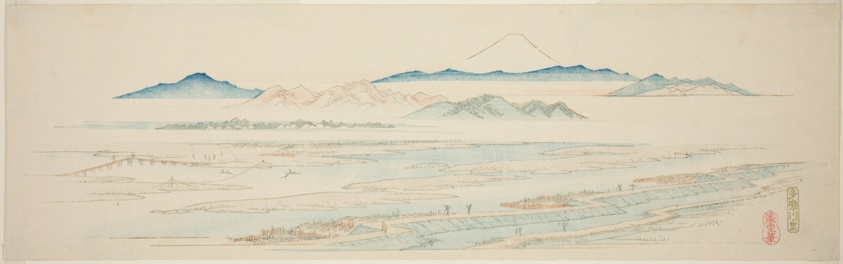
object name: Print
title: Village of Tamagawa (Tamagawa no sato), from an untitled series of famous views of the Edo suburbs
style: Japanese (culture or style)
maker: Utagawa Hiroshige 歌川 広重; Japanese, 1797-1858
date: c. 1839/40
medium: Color woodblock print; ebangire, surimono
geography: Japan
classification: woodblock print; print; asian art